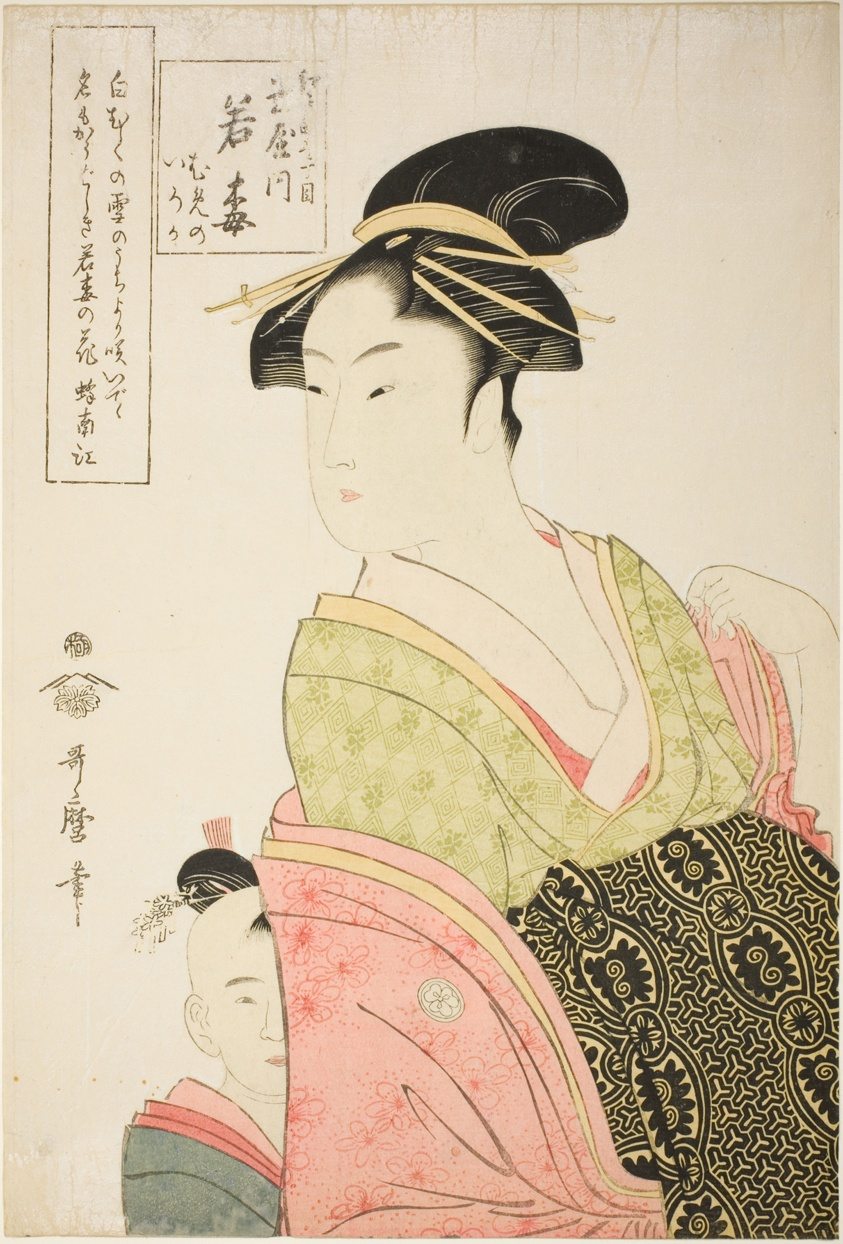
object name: Print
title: Wakaume of the Tamaya in Edo-cho itchome, and her child attendants Mumeno and Iroka (Edo-cho itchome, Tamaya uchi Wakaume Mumeno Iroka)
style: Japanese (culture or style)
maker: Kitagawa Utamaro 喜多川 歌麿; Japanese, 1753 (?)-1806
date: c. 1793/94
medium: Color woodblock print; oban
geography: Japan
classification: woodblock print; print; asian art